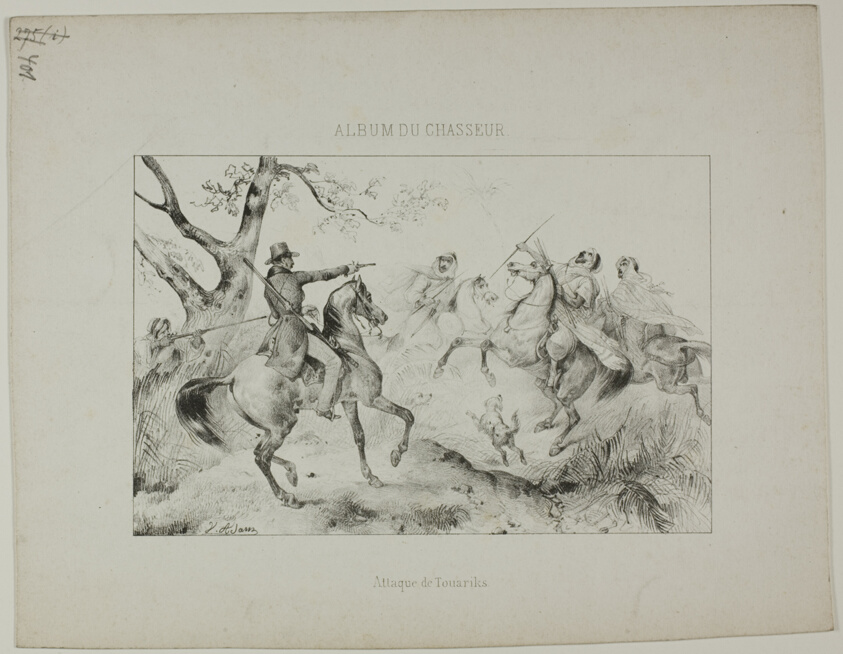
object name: Print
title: Attack of the Turks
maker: Victor Adam; French, 1801-1866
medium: Lithograph in black on cream wove paper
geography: France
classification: lithograph; print; prints and drawing